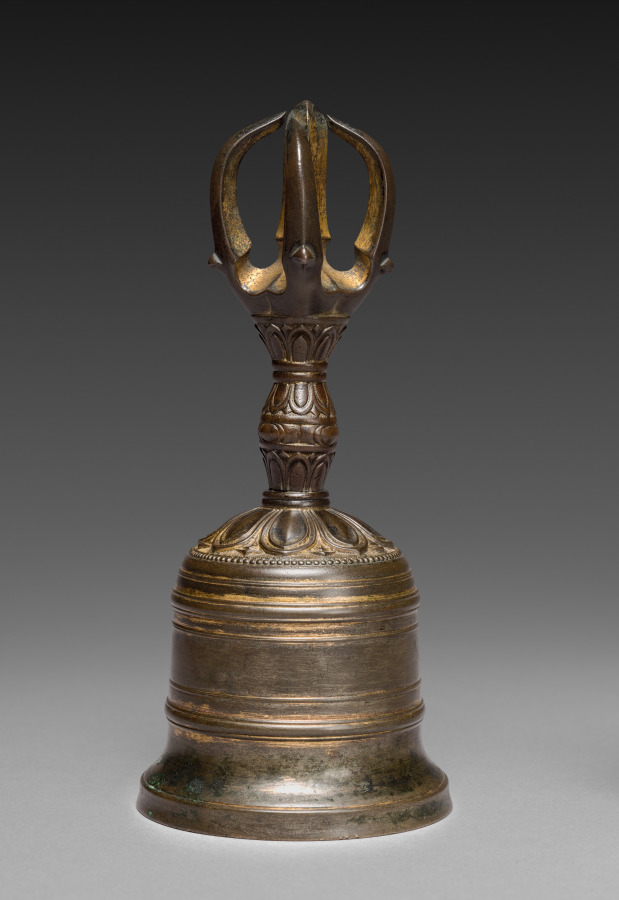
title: Five-pronged Vajra Bell (Gokorei)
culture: Japan, Kamakura period (1185–1333)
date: early 1300s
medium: gilt bronze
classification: Metalwork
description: The five prongs of this bell symbolize the Buddhist “Five Perfections”—generosity, morality, patience, perseverance, and concentration. The mouth of the bell symbolizes the “Sixth Perfection” of wisdom. The bell was used in Japanese Esoteric Buddhist rituals along with vajra pestles, or kongōsho.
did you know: Vajras are symbolic weapons, representing the properties of a diamond (indestructibility) and a thunderbolt (irresistible force), still used in Buddhist ceremonies today.